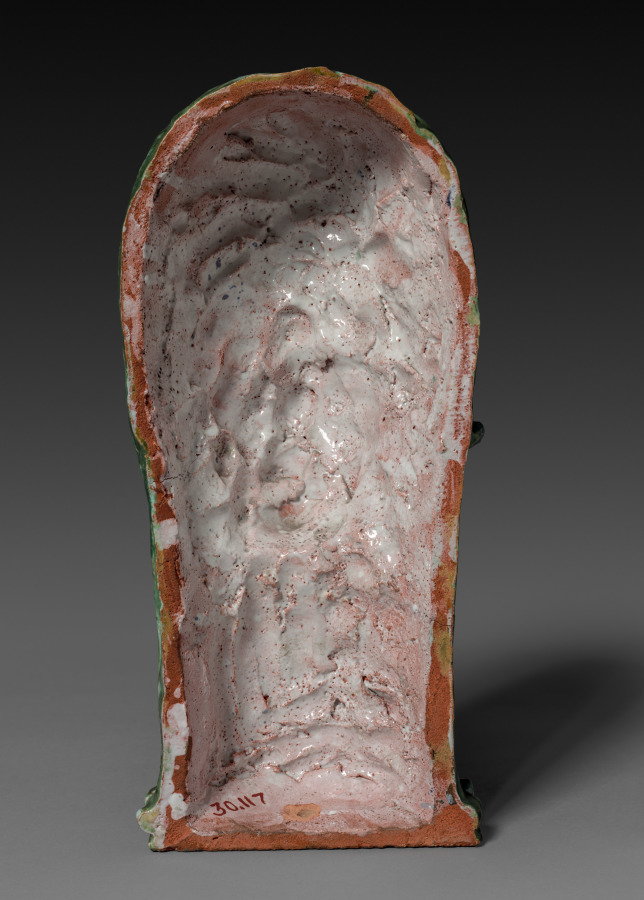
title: The Green Mask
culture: America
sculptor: Joseph C. Motto (American, 1892–1965)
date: 1929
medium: ceramic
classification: Ceramic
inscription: on right side: "Motto."